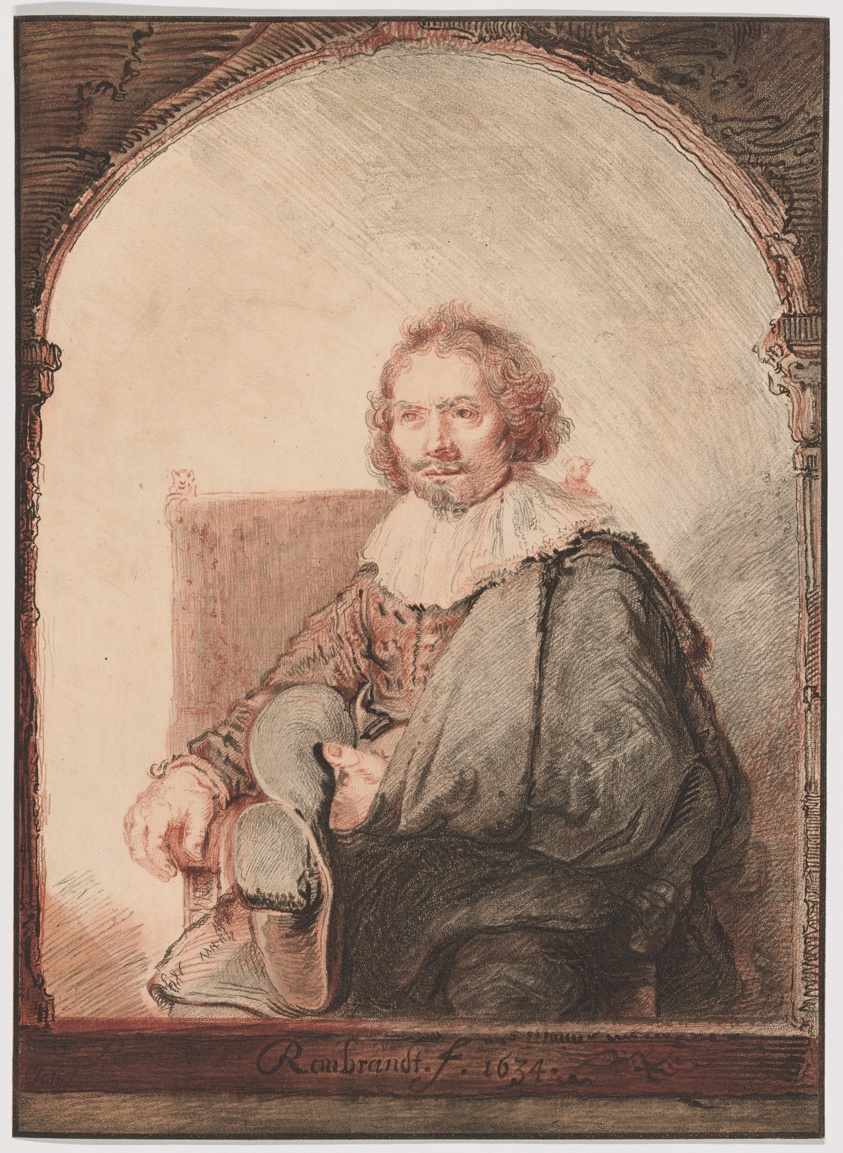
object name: Print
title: Portrait of a Man in an Armchair, from Collection d'imitations de Dessins d'après les Principaux Maîtres Hollandais et Flamands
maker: Christian Josi (Dutch, died 1828); after Rembrandt van Rijn (Dutch, 1606-1669)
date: 1826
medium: Soft ground etching, hard ground etching, aquatint, and roulette, printed from two plates in red-brown and black on white laid paper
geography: Holland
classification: etching; print; prints and drawing